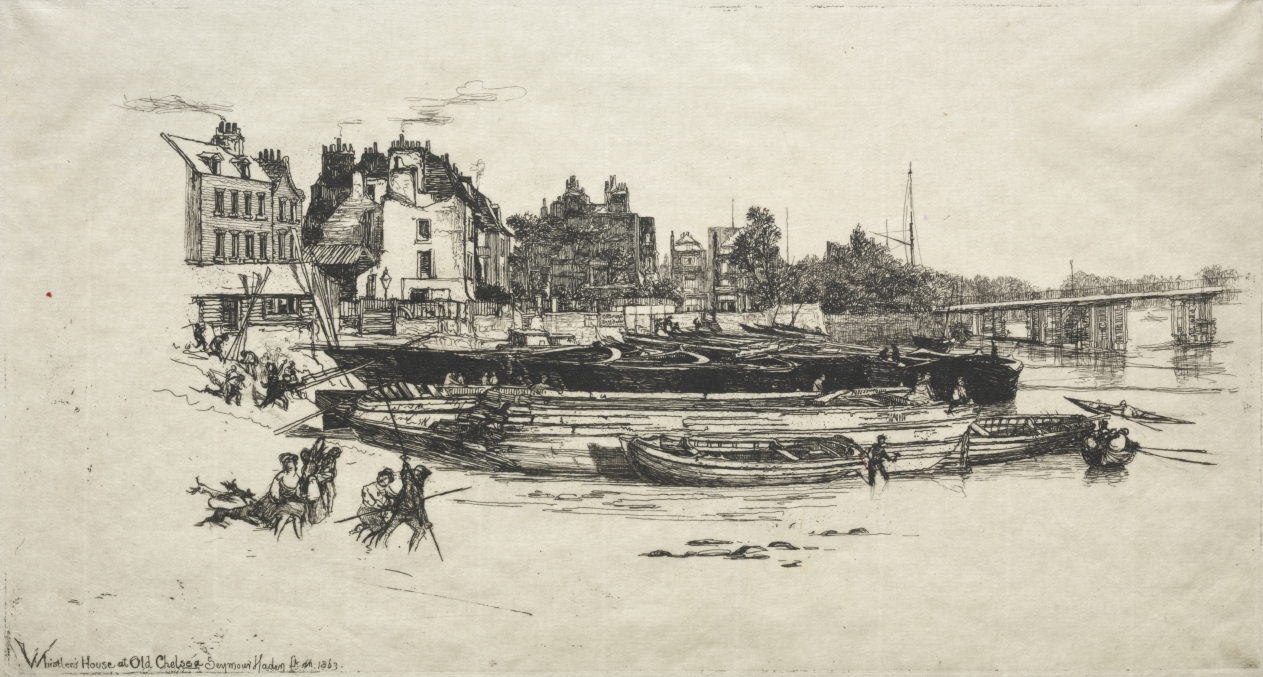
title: Whistler's House at Old Chelsea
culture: England, 19th century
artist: Francis Seymour Haden (British, 1818–1910)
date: 1863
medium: etching and drypoint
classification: Print